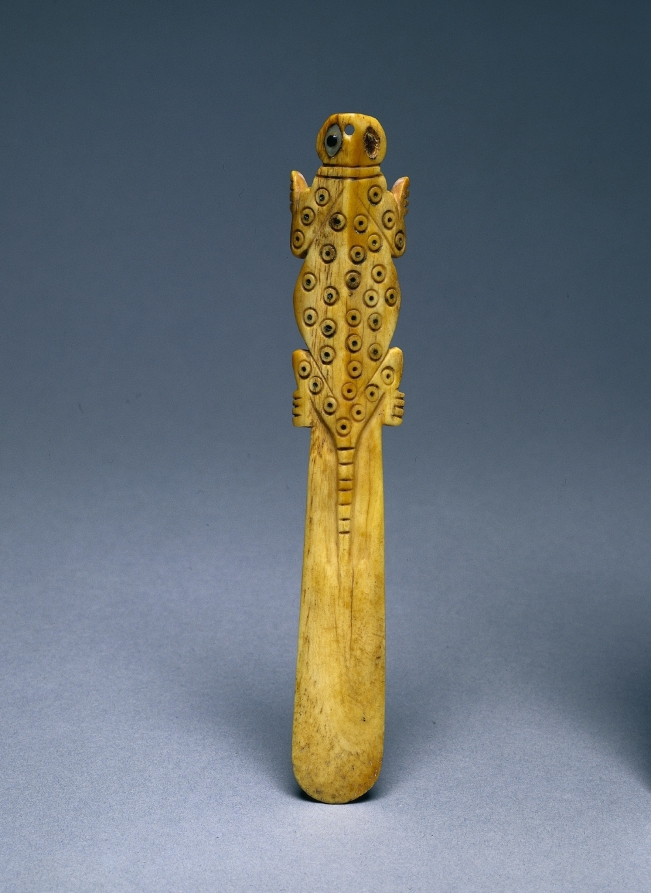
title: Spatula with Carved Lizard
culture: Peru, South Coast, Nasca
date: 100 BCE–700 CE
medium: bone with shell inlay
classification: Sculpture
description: Peruvian Indians today regard coca leaf as a sacred substance that creates communion with supernatural forces. The leaves are chewed with powdered lime that in antiquity was stored in containers and scooped with spatulas like those seen here. Aside from its ritual meaning, coca has practical benefits: it is vitamin-rich; like coffee, it induces clear-headedness; and it increases stamina. The lizard spatula is Nasca in style.